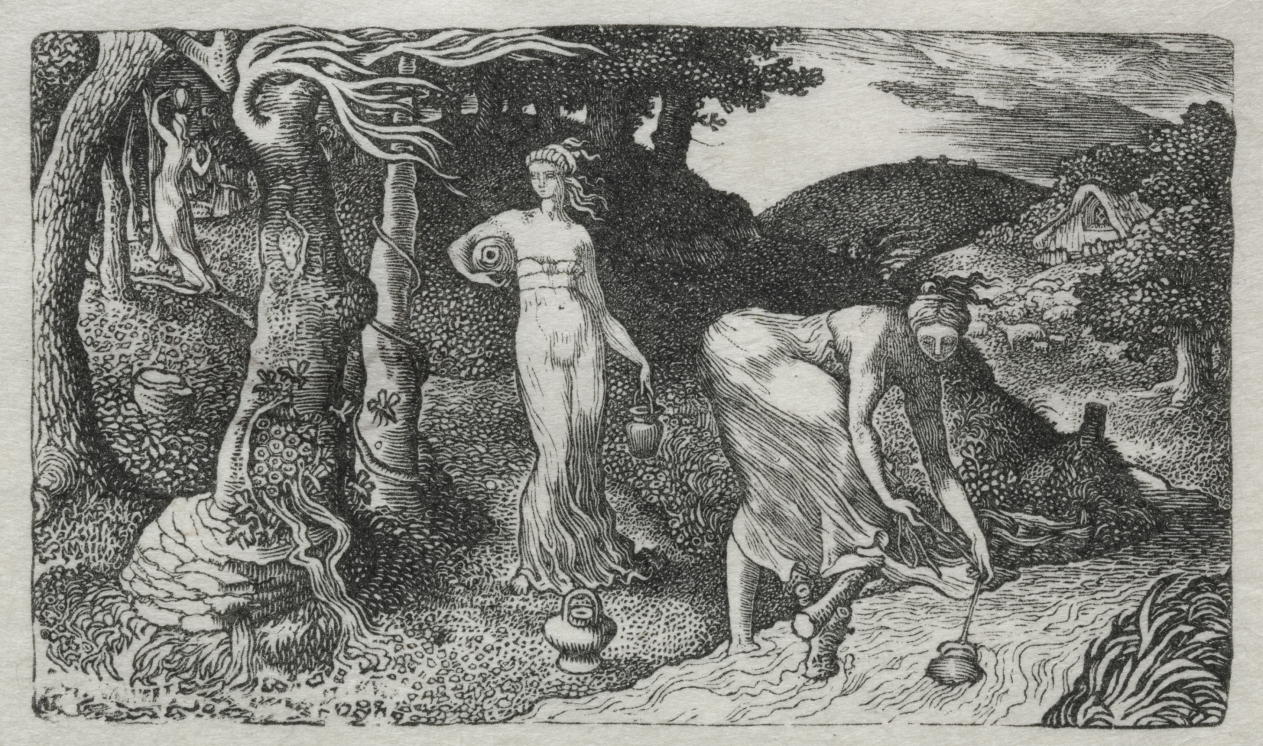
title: The Brook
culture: England, 19th century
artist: Edward Calvert (British, 1799–1883)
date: 1829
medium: wood engraving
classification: Print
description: Calvert was so influenced by William Blake's wood engravings that The Sheep of His Pasture is directly based on an illustration for The Pastorals of Virgil. Calvert, however, even more than Blake, exploited the ability of wood engraving to achieve the most delicate detail, so astonishing in these miniatures. Calvert's subject matter originated from a vision of the golden age of pastoral innocence and abundance that has both Christian and classical overtones. The women in The Brook resemble figures carved on antique gems, and the tree stumps symbolize the transitory nature of life.